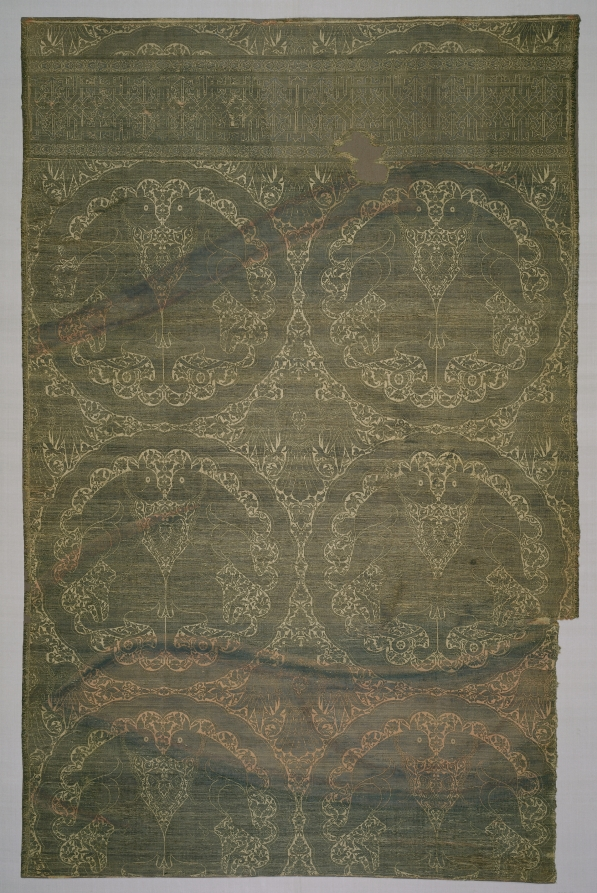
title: Cloth of gold with felines and eagles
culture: Northeast Iran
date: 1225–75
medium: Silk and gold thread: lampas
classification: Textile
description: Mongol taste for luxury was equated with gold, symbol of imperial authority, power, and legitimacy. This splendid cloth of gold-exceptionally large and luxurious-may have enriched the interior of a palace or a majestic tent. The golden pattern, although tarnished on the faded red silk ground, features scalloped medallions with felines whose long tails terminate in dragons’ heads amid elegant floral vines. Double-headed eagles form interstitial motifs on the floral ground. A radiant gold-on-gold band of pseudo-Arabic script enriches the top, woven with gold strips wrapped around a silk core on a ground of flat strips of gold, immediately beneath the pattern testing area.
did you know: Mongol cloths of gold, called nasji, incorporate Iranian, Central Asian, and Chinese features, reflecting the effects of gift exchanges and international commerce.